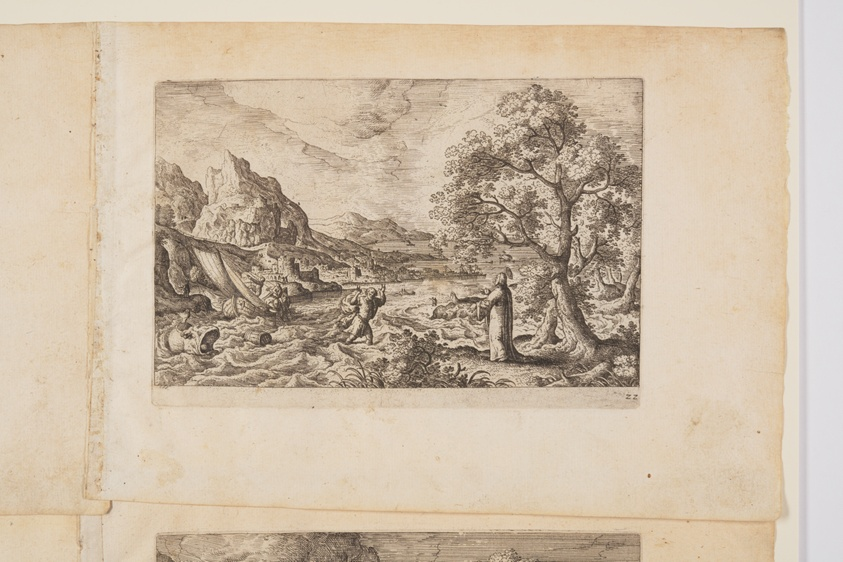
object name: Print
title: Plate 22, from Landscapes with Scenes from the Old and New Testament and Ovid’s Metamorphoses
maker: Hans Bol (Flemish, 1534–1593); published by Philip Galle (Flemish, 1537–1612)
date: 1574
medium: Etching on ivory laid paper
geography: Flanders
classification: print; paper; prints and drawing; etching